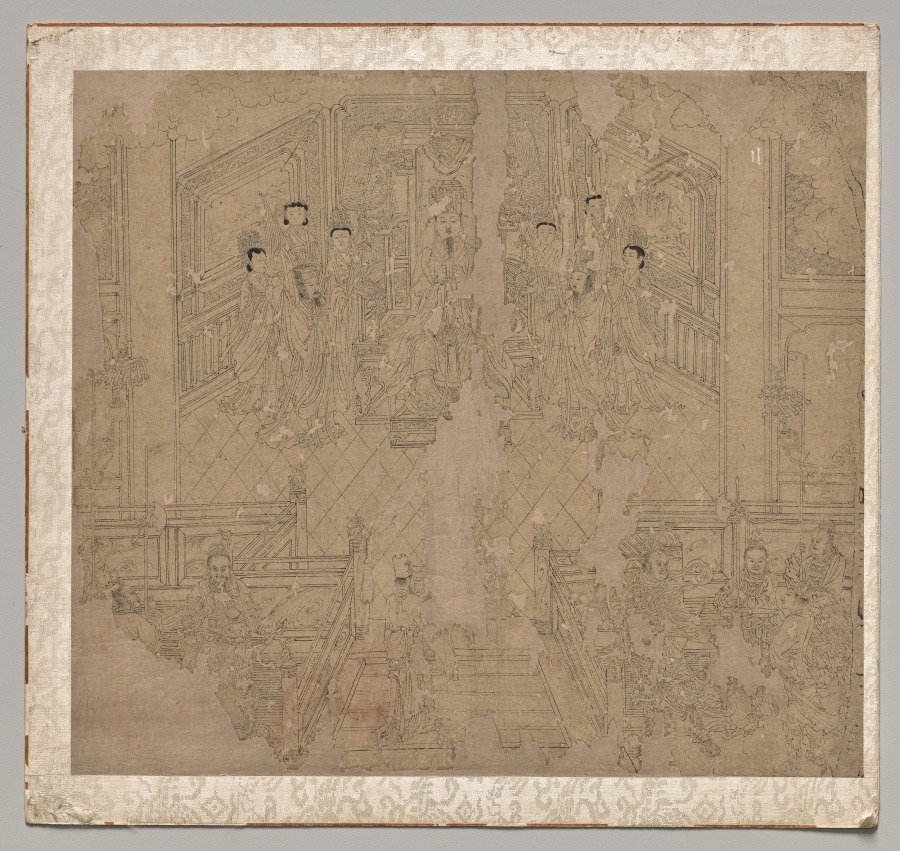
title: Album of Daoist and Buddhist Themes: Procession of Daoist Deities: Leaf 2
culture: China, Southern Song dynasty (1127-1279)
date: 1200s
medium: Album, ink on paper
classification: Painting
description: This extraordinary album has 50 paintings on a variety of religious subjects. They were likely created by several master craftsmen to share with studio apprentices as models for fulfilling commissions. The Jade Emperor and the Daoist pantheon make up the first 26 leaves. The next 14 leaves portray the Buddhist Ten Kings of Hell administering punishments to the dead. The third section, called “Clearing the Mountains,” features divine soldiers, led presumably by the deity Erlang Shen 二郎神, fighting undesirable creatures.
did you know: The Jade Emperor 玉帝 is surrounded by attendants.